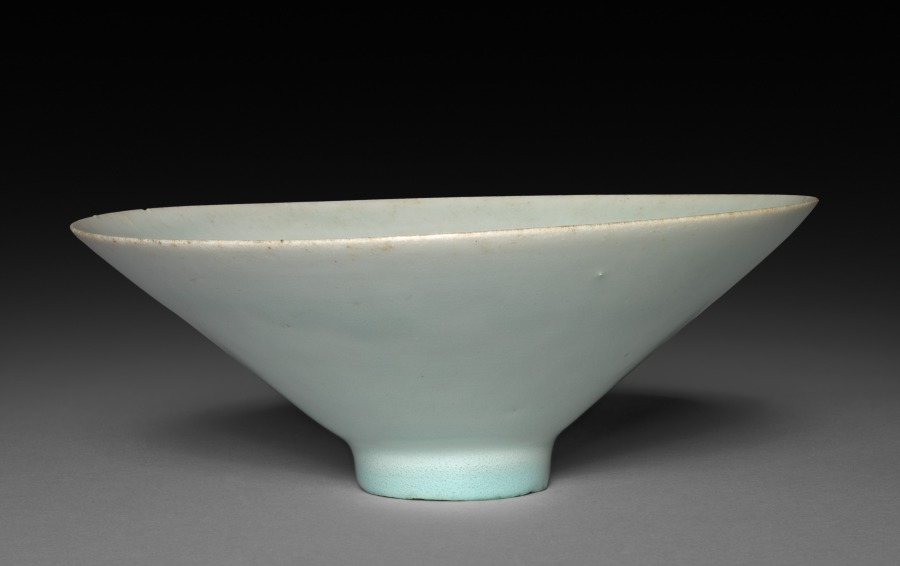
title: Conical Bowl with Floral Scroll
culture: China, Jiangxi Province, Jingdezhen kilns, Southern Song dynasty (1127–1279)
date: 1100s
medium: Glazed porcelain with incised decoration, qingbai ("blue-white") ware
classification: Ceramic